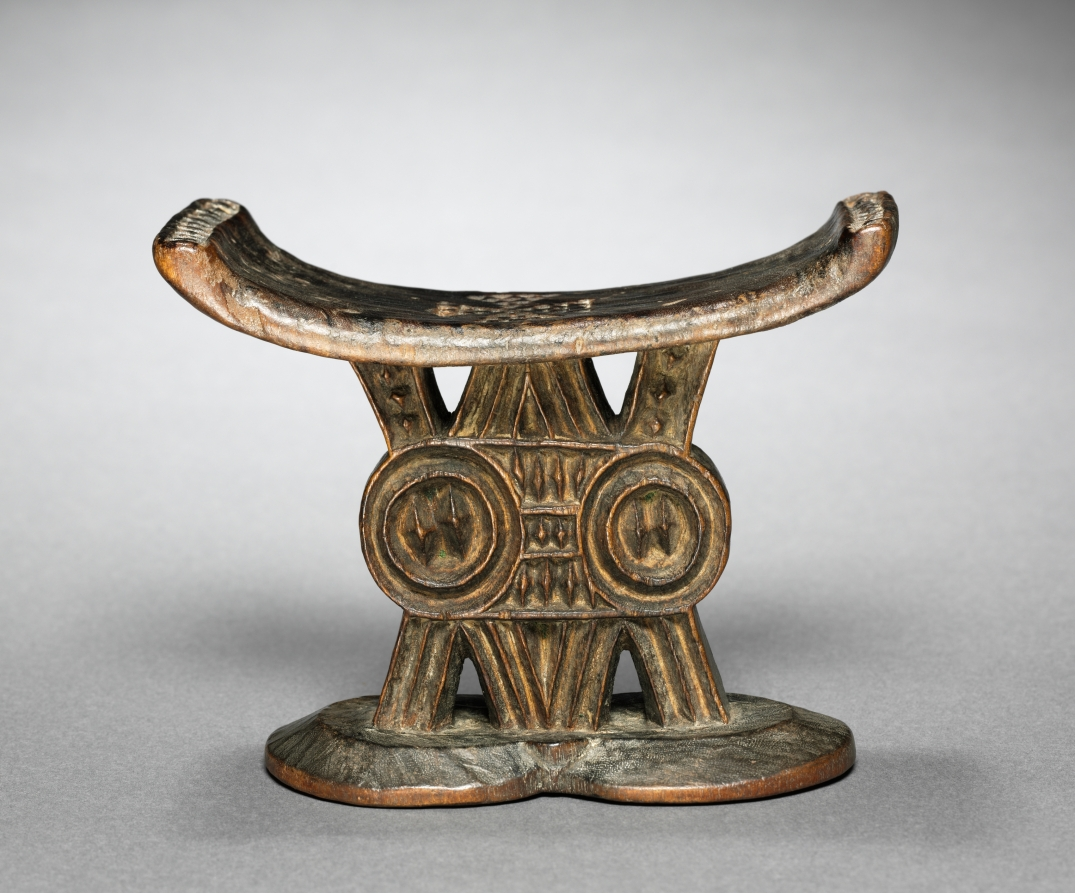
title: Headrest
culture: Africa, Southern Africa, Mozambique, Shona-style maker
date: 1900s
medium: Wood and colorant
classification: Furniture and woodwork